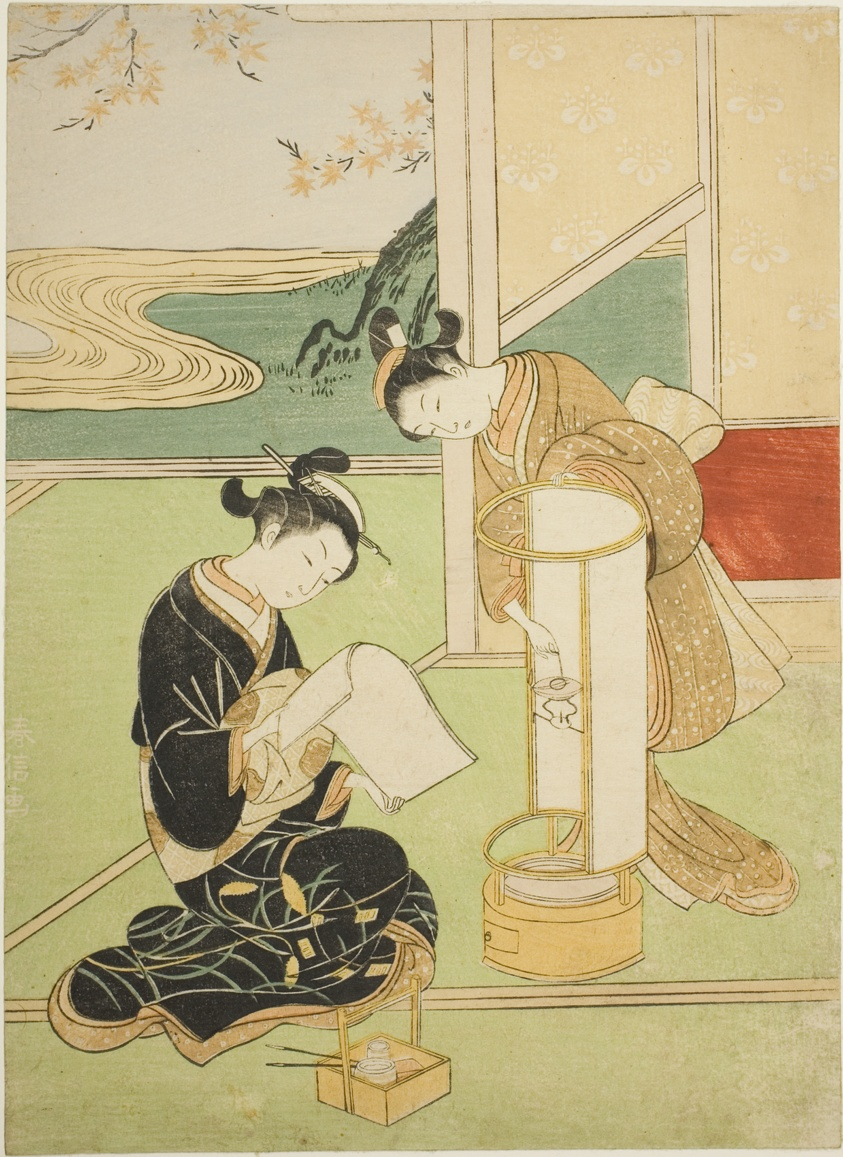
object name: Print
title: Evening Glow of a Lamp (Andon no sekisho), from the series "Eight Views of the Parlor (Zashiki hakkei)"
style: Japanese (culture or style)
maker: Suzuki Harunobu 鈴木 春信; Japanese, 1725 (?)-1770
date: c. 1766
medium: Color woodblock print; chuban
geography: Japan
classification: woodblock print; print; asian art